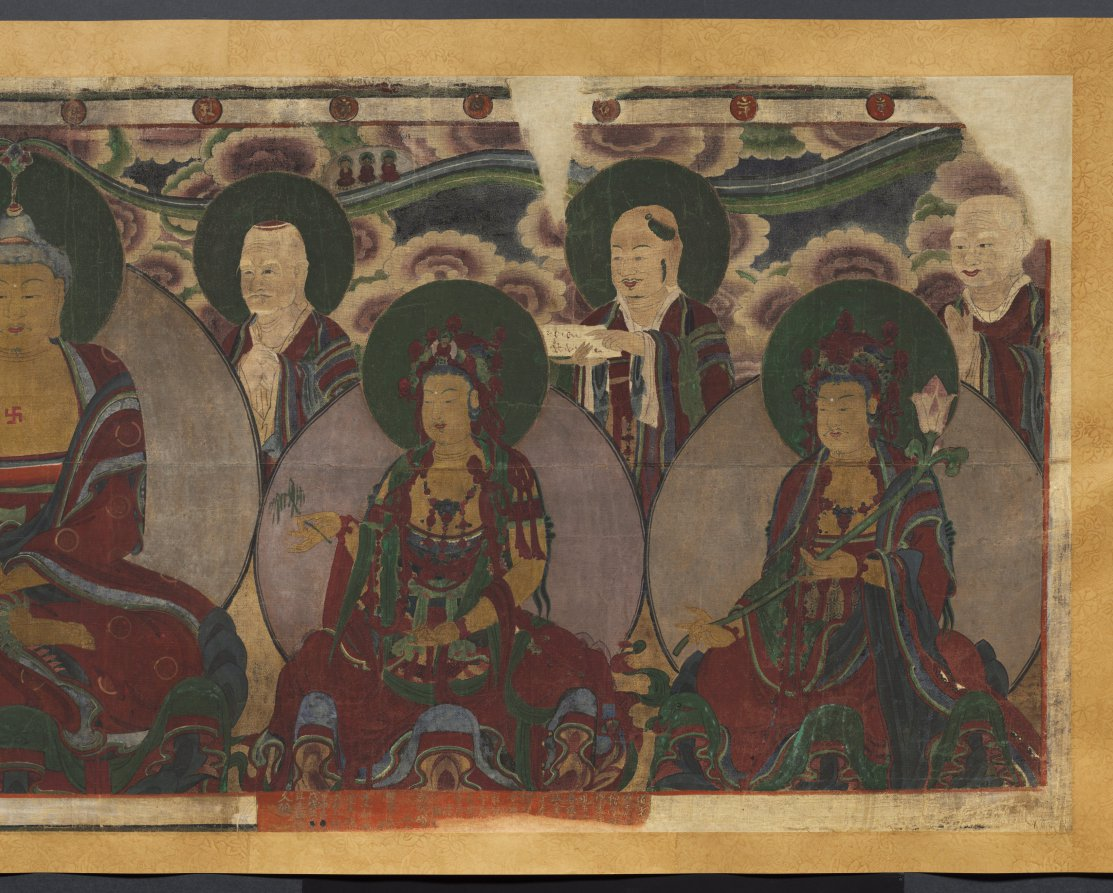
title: Assembly of Buddhist Deities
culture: Korea, Joseon dynasty (1392–1910)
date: 1846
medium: handscroll; ink and color on silk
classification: Painting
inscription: Inscription dated 1846.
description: The central deity in this Buddhist painting is Sākyamuni Buddha, given that he is displaying the earth-touching hand gesture. He is surrounded by several bodhisattvas and disciples. The inscription below, even though partly erased, tells us that the painting was created in 1846 and was hung in the monks’ residential hall.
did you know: The inscription below, even though partly erased, tells us that the painting was hung in the monks’ residential hall.